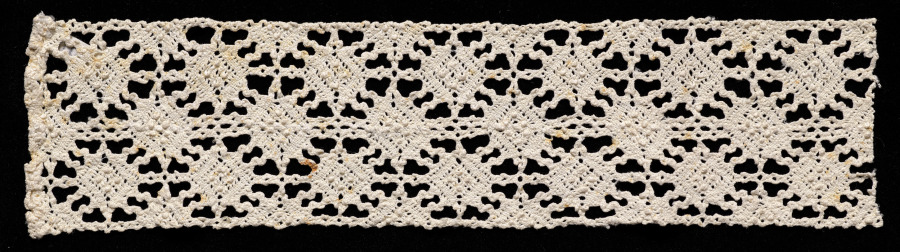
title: Lace Insertion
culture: Italy, Venice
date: 1540–60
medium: Bobbin lace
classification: Lace